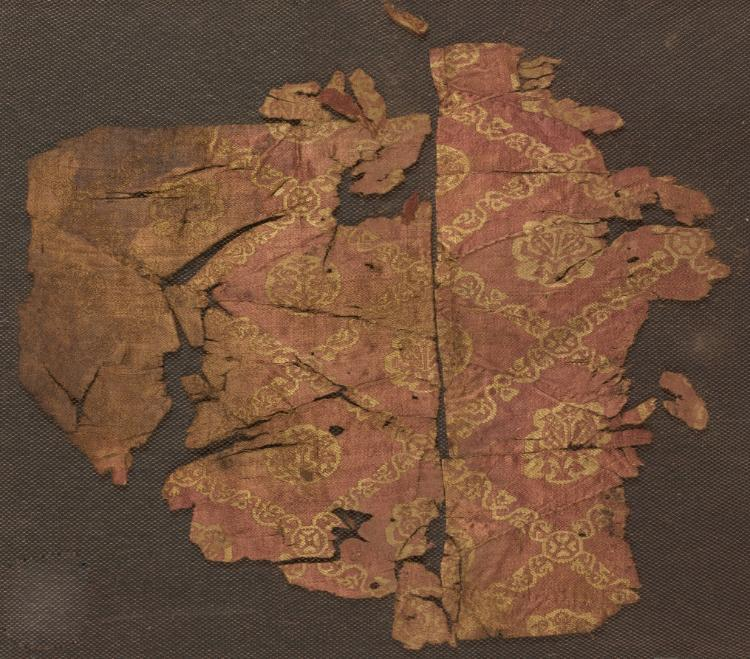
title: Several Fragments (Some Sewn Together)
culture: Syria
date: 8th-9th century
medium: compound twill, silk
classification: Textile